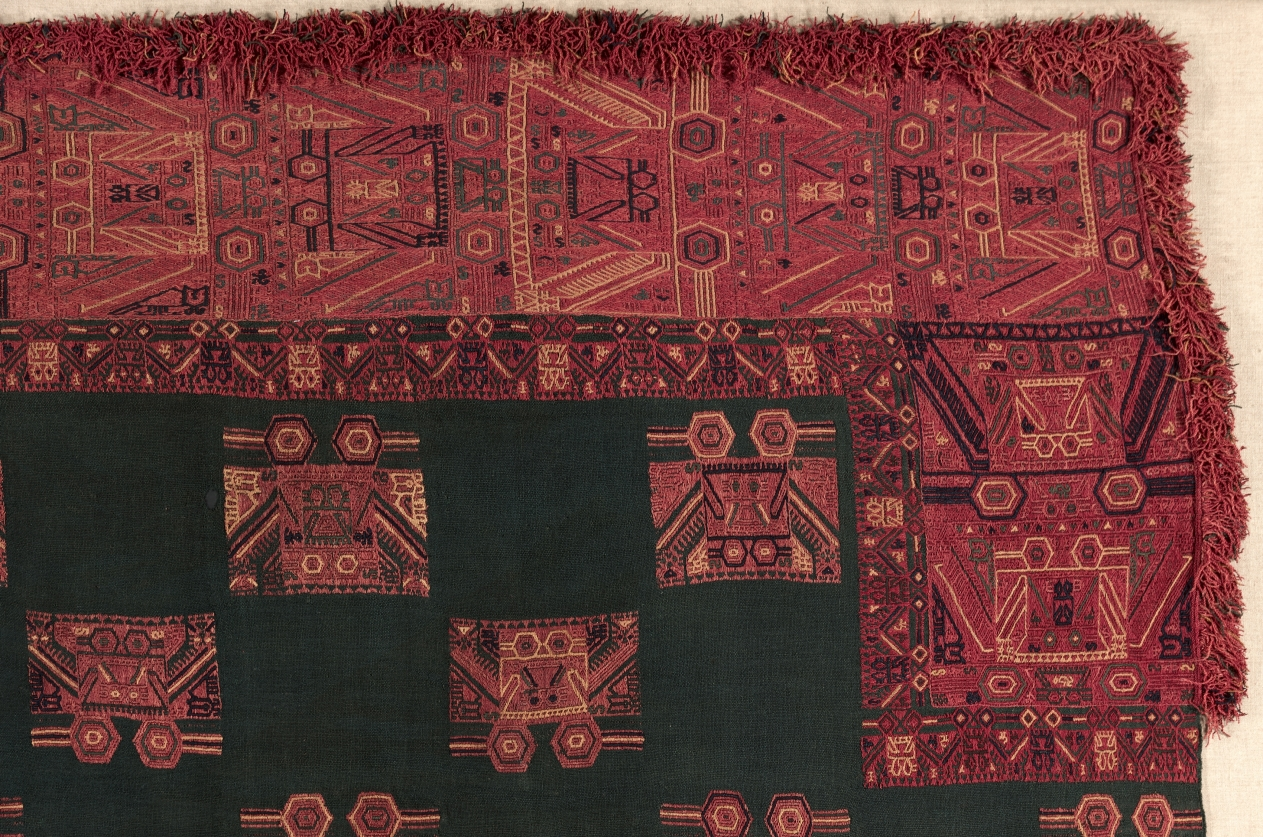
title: Mantle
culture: Peru, South Coast, Paracas (Cavernas) style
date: c. 300 BCE–200 CE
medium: camelid fiber: plain weave with embroidery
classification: Textile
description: Buried in shaft-tombs, or rectangular sunken chambers, the Paracas dead were wrapped in layers of cloth and accompanied by pottery, food, and other offerings. The dry environment of the Paracas Peninsula helped preserve many of these textiles, including richly ornamented garments buried with important individuals. This mantle, probably worn like a cloak, relates closely to the tunic (CMA 1946.227) and long headband (CMA 1946.228) due to their shared imagery. Its double-headed bird motifs— embroidered in vivid red, blue, yellow, and green yarns—likely had symbolic significance, although the specific meaning remains unknown.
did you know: The profusion and decoration of textiles in Paracas burials shows the value placed on cloth.